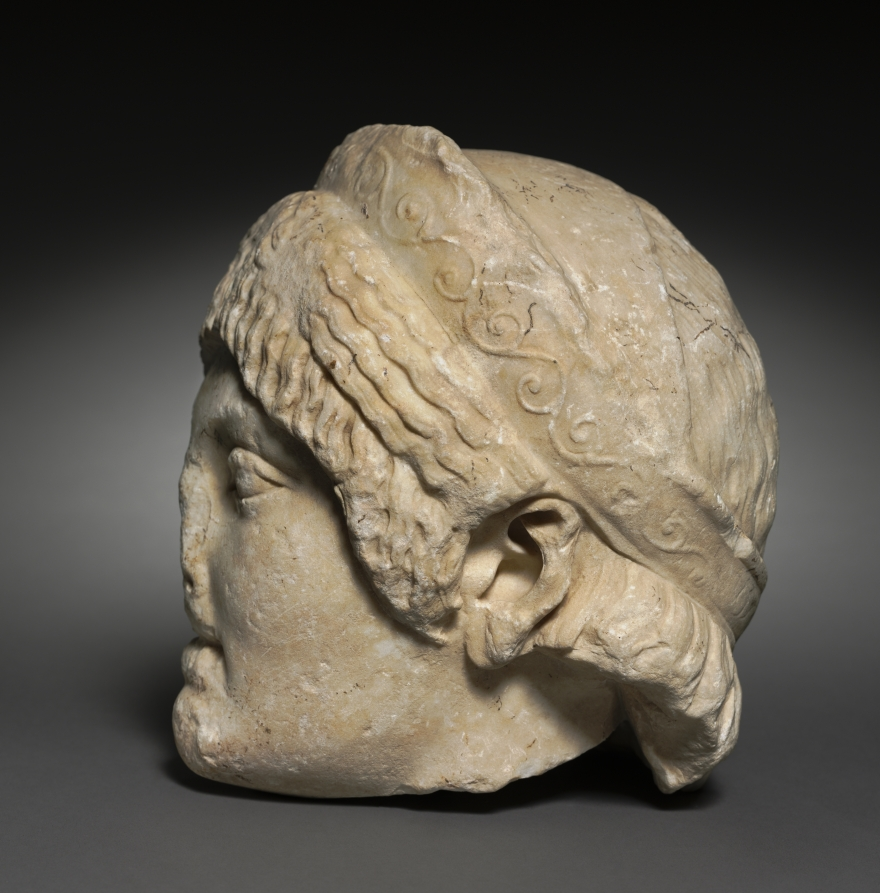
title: Head of a Young Woman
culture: Italy, Roman (archaizing)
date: 25–1 BCE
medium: marble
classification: Sculpture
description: This head of a young woman is designed after Greek art in the Archaic period (c. 600–480 BCE). She references a type of Greek statue called a kore in her heavily patterned hair, almond-shaped eyes, neutral expression, and large disk earrings, best preserved on the right ear. Her stephane or diadem crown is from the later Hellenistic period; however, with the addition of the decorative vegetal scroll it is characteristic of Roman art. All these elements together are not found in original Greek archaic artworks. This ancient combination of deliberately historic styles is called archaizing or archaistic by modern scholars.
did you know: When Rome conquered Greece in 146 BCE, Romans developed a taste for historic Greek art.